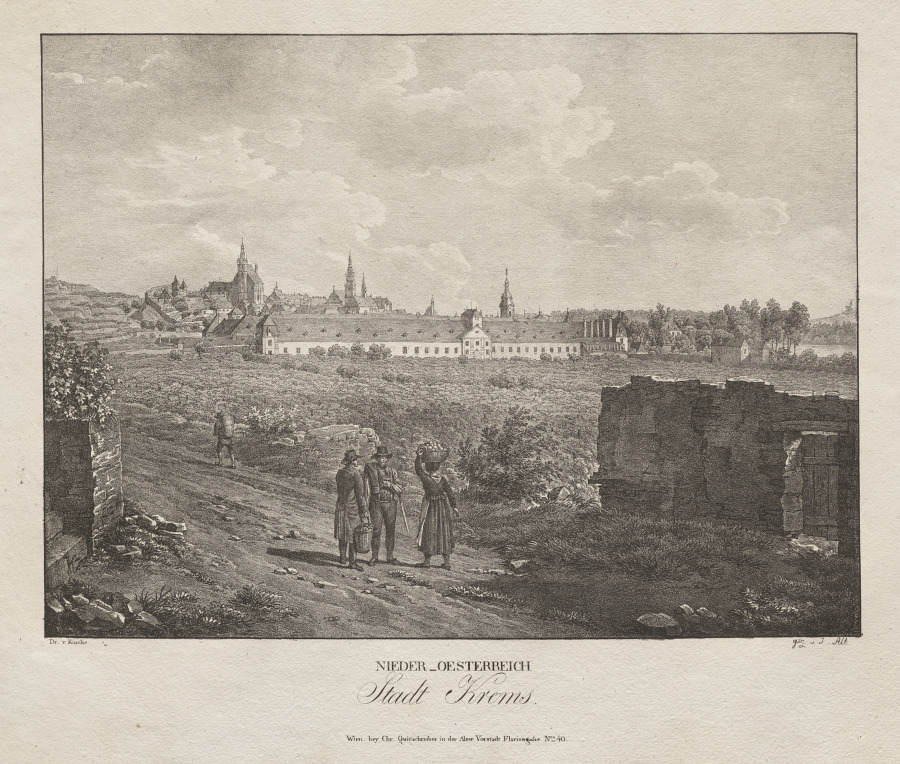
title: Nieder-oesterreich, Stadt Krems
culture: Austria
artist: Jakob Alt (Austrian, 1789–1872)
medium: lithograph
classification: Print